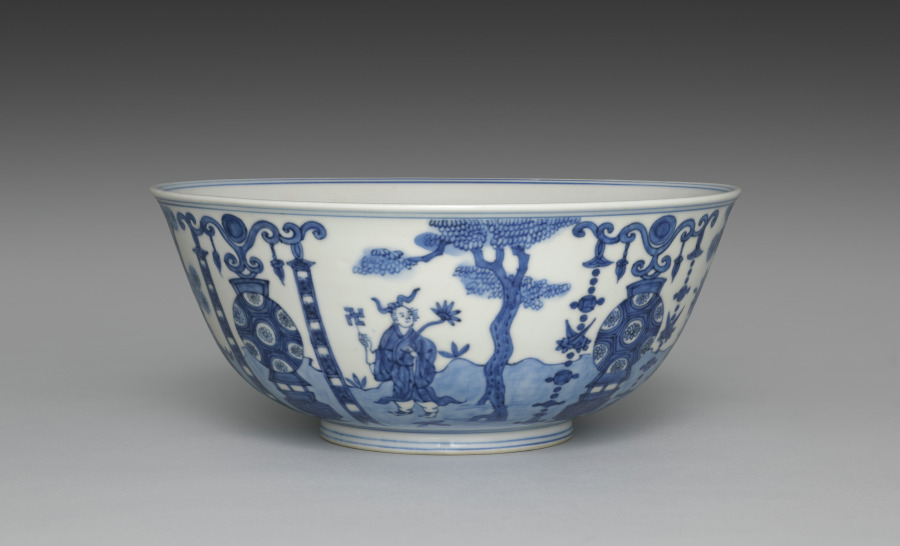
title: Bowl from Nesting Bowls with Daoist Immortals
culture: Japan, Meiji period (1868–1912)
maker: Seifū Yohei III (Japanese, 1851–1914)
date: 1893–1914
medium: Middle bowl from a set of three bowls; porcelain with underglaze blue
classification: Ceramic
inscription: 大日本清風造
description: Yohei III was capable of ink painting–like compositions in underglaze blue, as well as more decorative ones like that on this set of three nesting bowls. Bowls with very similar designs in five colors were produced in the reign of the Wanli emperor (r. 1572–1620 ) during the Ming dynasty, and Yohei must have had direct access to one of these or to a close copy. A scene of Daoist immortals is presented on the bowls. On each one, the ground plane is defined with a blue wash. Four lanterns are evenly spaced around the bowl. Two are flanked with linked-piece metalwork banners of the seven treasures. The alternate altars are adorned with textile banners. In between them are four immortals, each standing beneath a tree with small plants surrounding his feet. Two of the immortals hold fruit on a tray. Another carries an elixir-filled ewer and a willow branch. The fourth holds a swastika (manji), here an auspicious symbol, and a flower. Curiously, the inscription inside each footring reads “Made by Seifu of Great Japan,” in emulation of the dynasty and reign inscriptions that appear on Chinese ceramics; but one can also see through the translucent glaze another inscription, “Seifu Yohei,” written in large characters within a double band of blue on the largest bowl.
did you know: In the bottom of each bowl is a scene of two robed immortals who appear to stand on a precipice in a mountainous landscape high in the clouds, with celestial orbs over their heads.